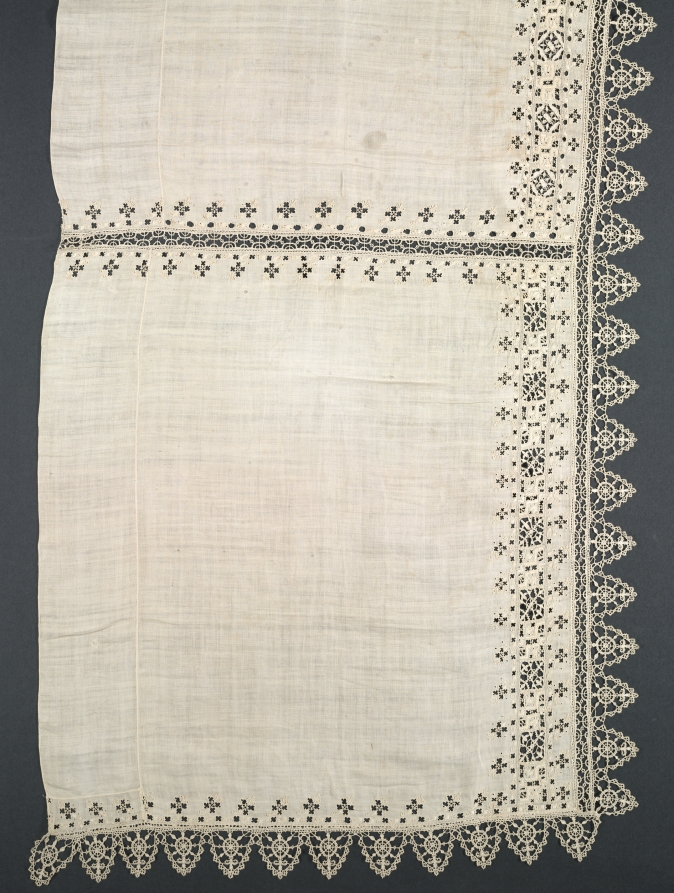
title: Altar Frontal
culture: Italy, Genoa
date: 1500s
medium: Linen: needle lace (cutwork) and bobbin lace edging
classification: Lace